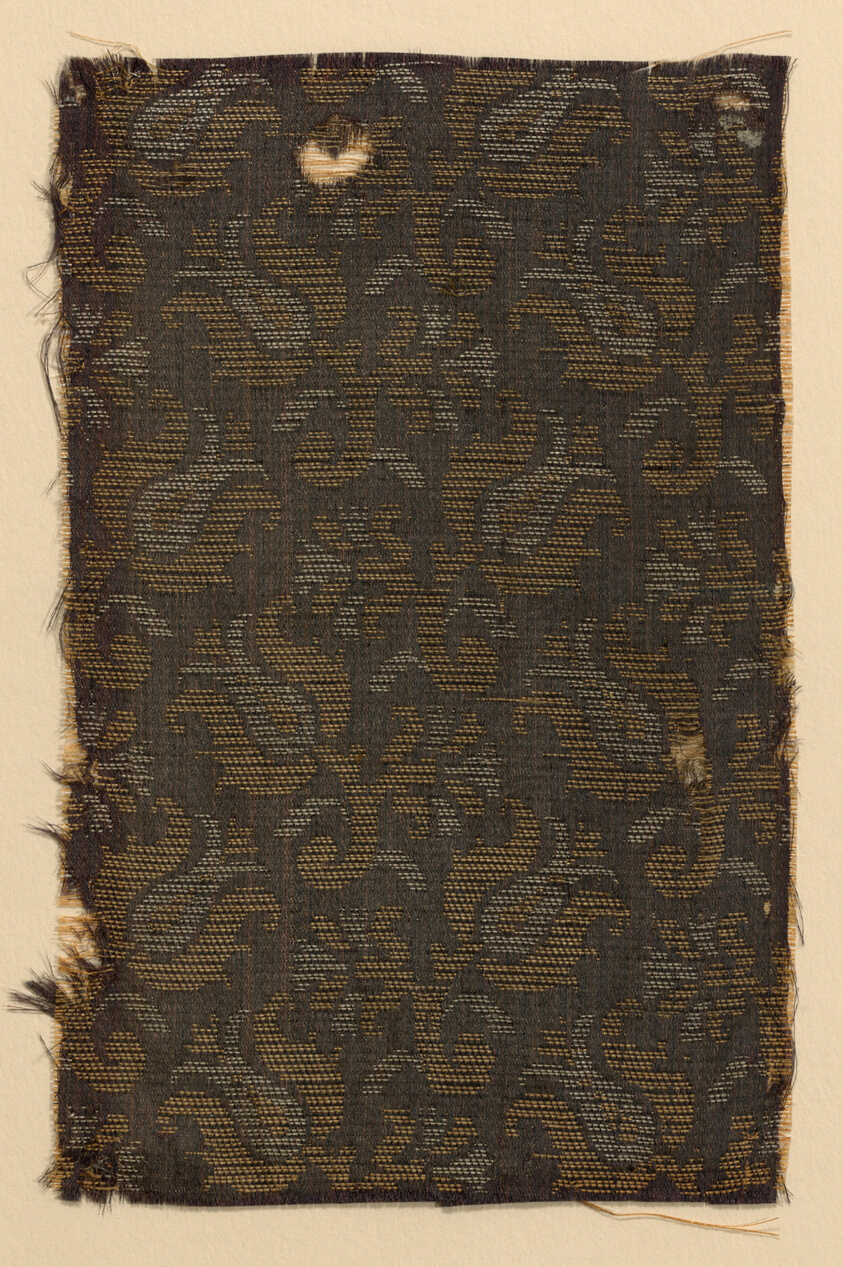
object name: Textile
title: Fragment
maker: Italy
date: 1601/25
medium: Silk and silver gilt strips, warp-float faced satin weave with self-patterning ground wefts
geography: Italy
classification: textile; weaving